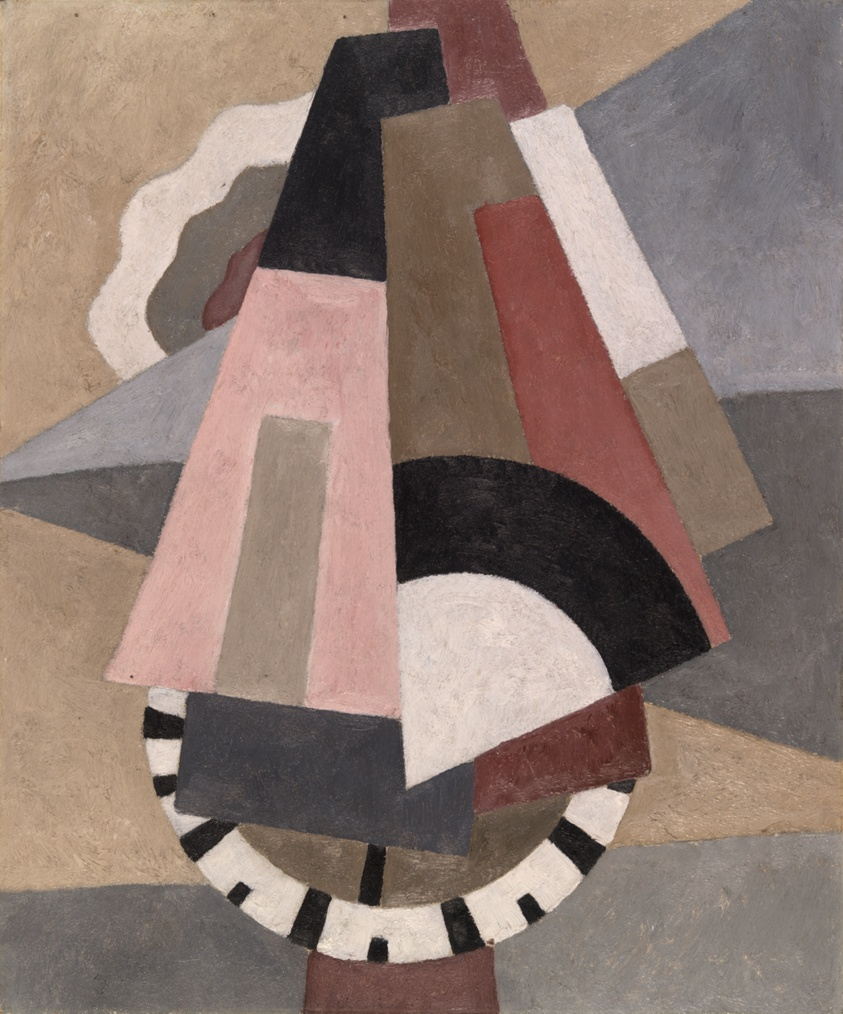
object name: Painting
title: Provincetown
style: Modernism, Cubism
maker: Marsden Hartley (American, 1877–1943)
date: 1916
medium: Oil on composition board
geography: United States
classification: oil on panel; painting; modern and contemporary art